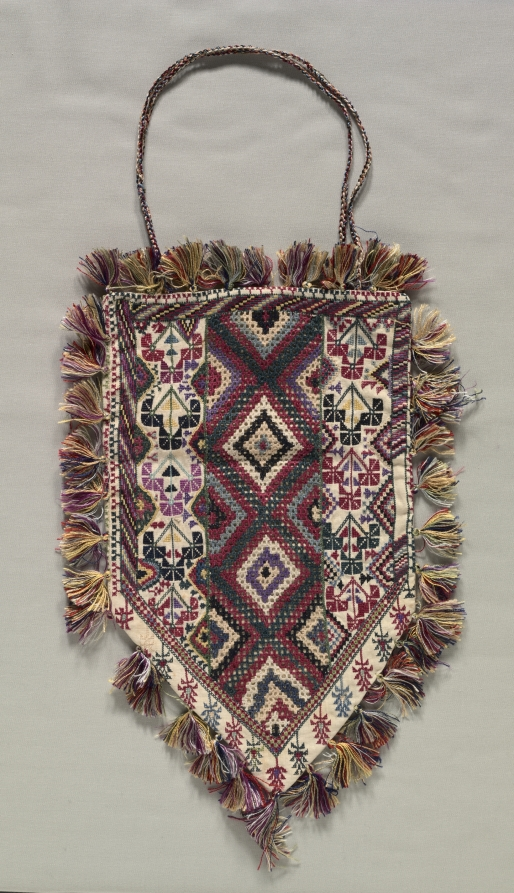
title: Bag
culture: Turkey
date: before 1957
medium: silk embroidery on cotton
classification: Embroidery